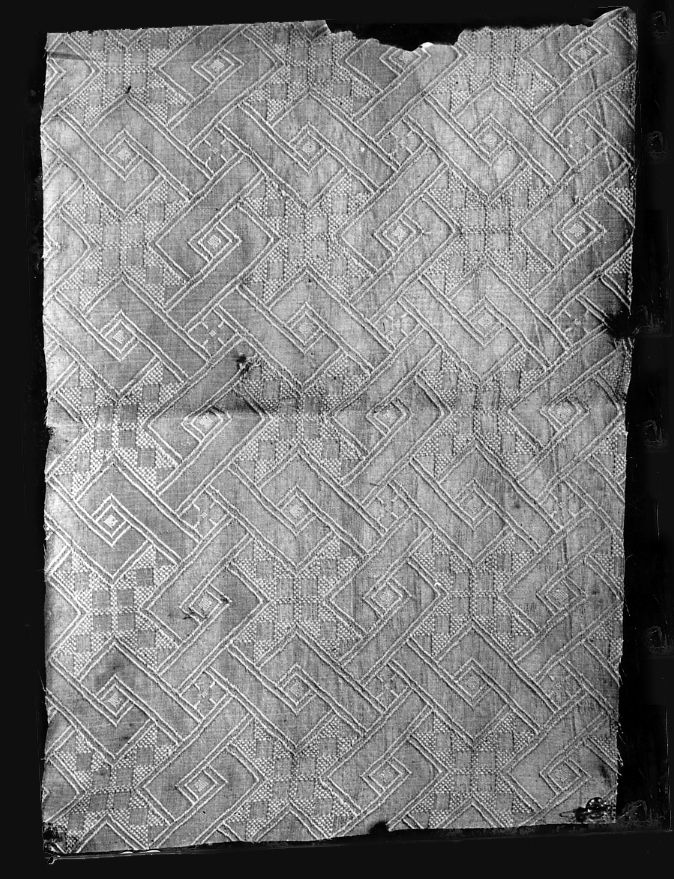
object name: Textile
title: Fragment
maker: Italy, Lucca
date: 15th century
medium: Linen and silk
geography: Italy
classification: textile; weaving - velvet; weaving